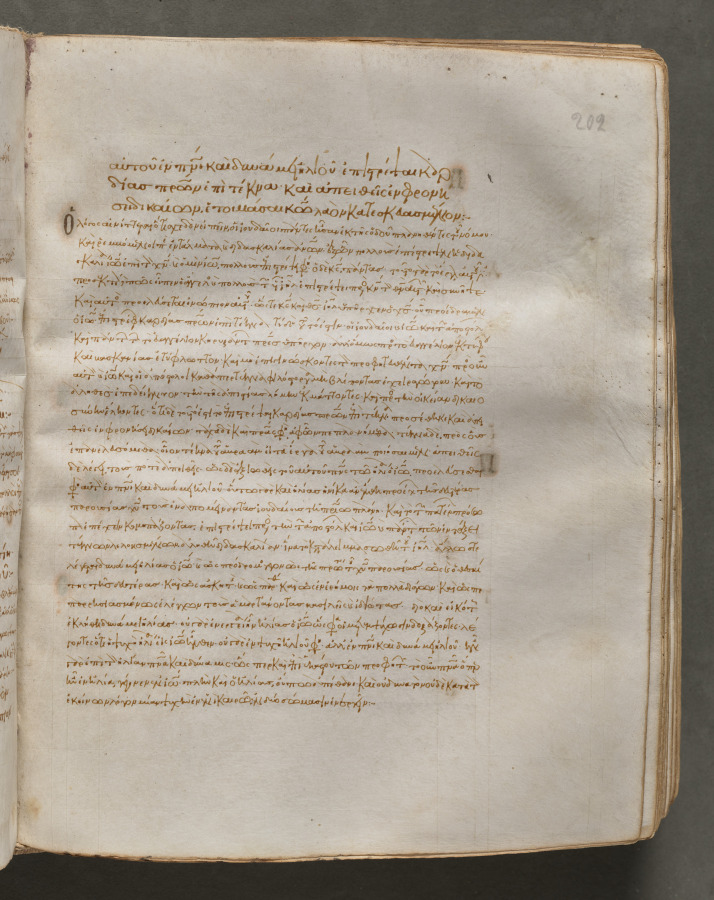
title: Text, folio 202 (recto), from a Gospel Book with Commentaries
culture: Byzantium, Constantinople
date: c. 1000–1100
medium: ink, tempera, and gold on vellum; leather binding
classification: Bound Volume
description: Each of the four gospels in this book opens on a page with brilliantly illuminated borders depicting the author of the text as well as birds-principally peacocks, symbols of the immortality of the soul-and fountains, representing the fountain of life and the salvation of the soul. This volume consists of 428 leaves with texts in Greek. Its level of sophistication suggests that it was probably written and decorated in a monastery in Constantinople.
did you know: Gospel Books were carried in procession through Byzantine churches.